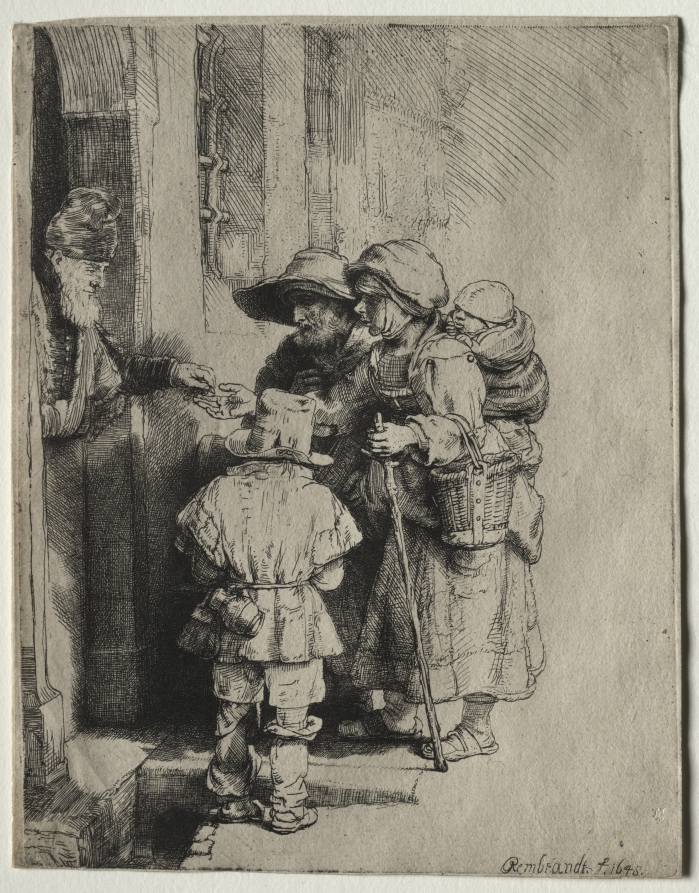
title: Beggars Receiving Alms at the Door of a House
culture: Netherlands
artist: Rembrandt van Rijn (Dutch, 1606–1669)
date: 1648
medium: etching, with engraving and drypoint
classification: Print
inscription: lower right, in plate: Rembrandt. f. 1648. ; VERSO, upper right, in graphite: 4987[sideways] ; lower half, in graphite: Superb impression of theis masterpiece / Professor Legros says that this is Rembrndt's / best plate. / From the unidentified / collection. Fagen 263 / (white stamp on face of print) ; lower left, in graphite: A79349 ; lower center, in pen and brown ink: t